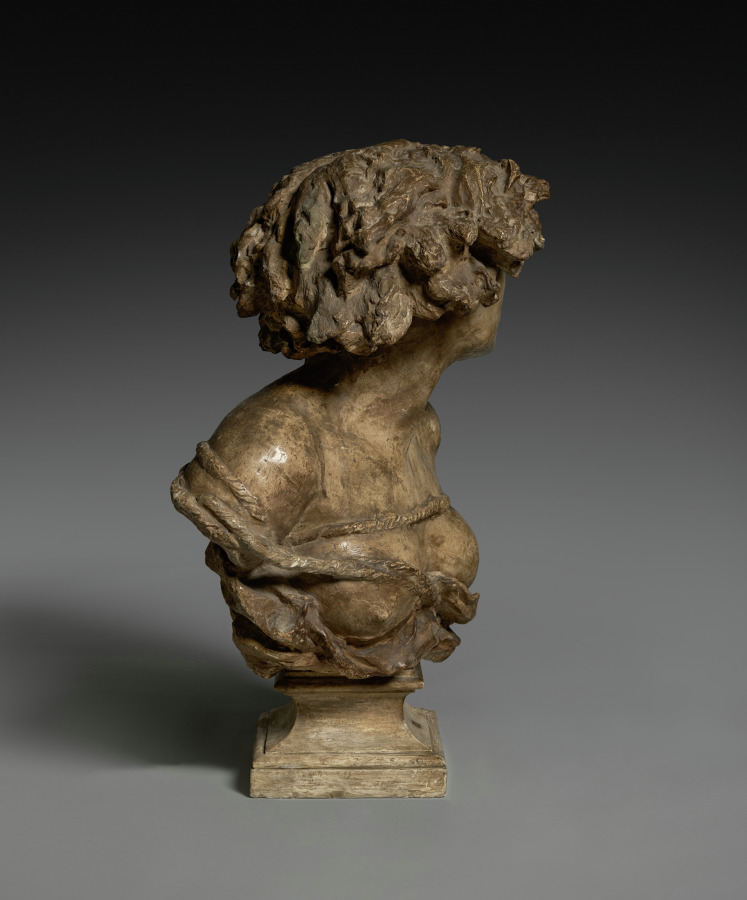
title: Why Born Enslaved!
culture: France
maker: Jean-Baptiste Carpeaux (French, 1827–1875)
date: 1867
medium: Plaster, original polychromed surface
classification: Sculpture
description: One of the most powerful expressions of abolitionist sentiment in the visual arts, Why Born Enslaved! depicts an African woman bound by ropes and looking defiantly upward. The ropes press painfully into her breasts; her torn blouse alludes to the violence responsible for her condition. The original, polychromed surface is covered with complex, nuanced hatchings and subtle modeling. Evidence indicates that this masterpiece of 19th-century French sculpture served as the master model for numerous casts in other museum collections.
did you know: Although officially abolished in France since 1848, slavery remained a hotly contested issue in Carpeaux’s time as it remained legal or tolerated in various countries around the world.